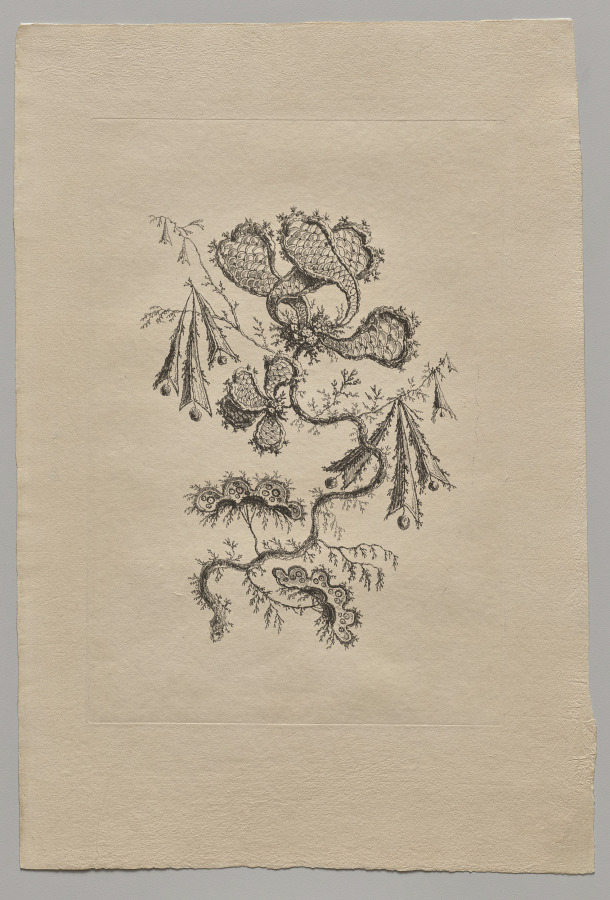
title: Persian Flowers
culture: France, 18th century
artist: Jean Baptiste Pillement (French, 1728–1808)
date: 1755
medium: etching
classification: Print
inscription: Watermark: top half of Dovecote, left side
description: Jean Baptiste Pillement was one of the most influential designers of the Rococo period, known for his varied and prolific chinoiseries (European variants of Chinese and Japanese motifs). His designs were spread throughout Europe primarily via their translation into prints. This print is one of a set of six etched by Pillement himself. Each depicts a so-called “Persian” flower, largely fantasies, presenting strange, alienlike floral forms that could be adapted to various uses from textiles to wall decorations.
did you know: The artist Jean Baptiste Pillement was employed by Marie Antoinette to create decorations for her legendary retreat, the Petit Trianon, at Versailles.